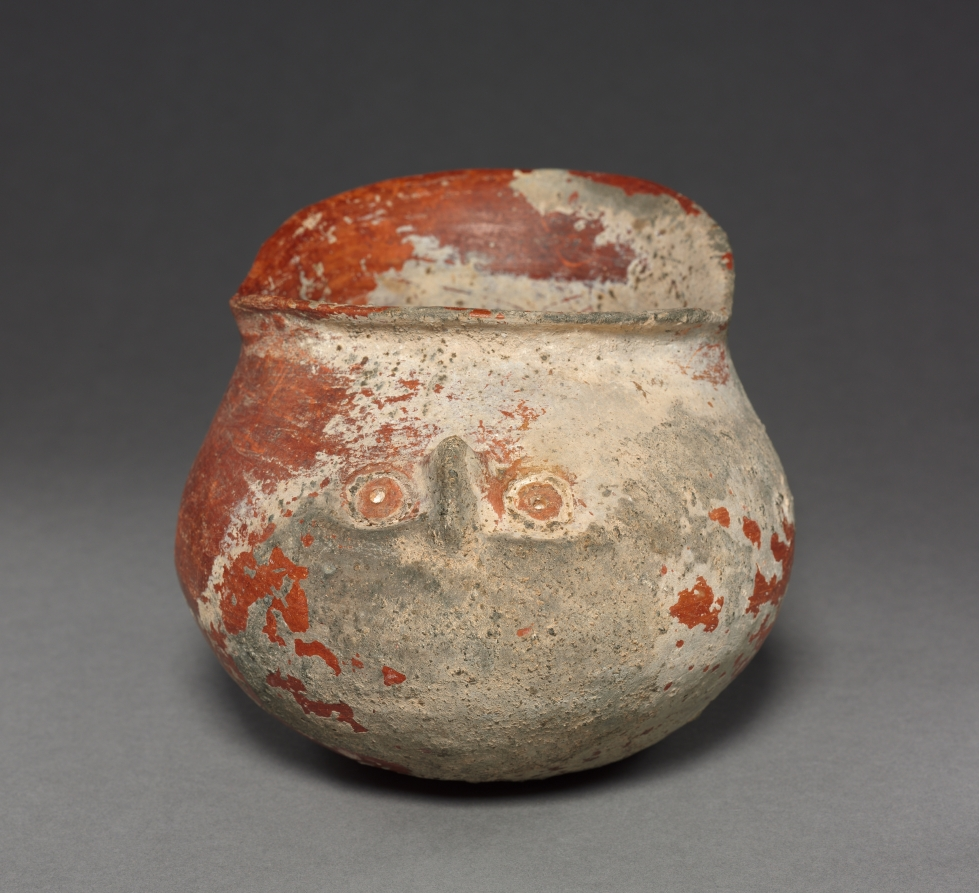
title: Head Effigy Bowl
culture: Mexico, Region of Tilantongo, District of Tlaxiaco, Nayarit style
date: 100 BCE–300 CE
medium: pottery with burnished red slip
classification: Ceramic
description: After about 200 BC, West Mexican chieftains gained in authority, their new status reflected in shaft tombs that shelter not only their remains but also lavish offerings, including sculptural ceramics. Many of the ceramics may refer to the crucial activities of a chief’s life, such as marriage, feasting, and war. The meaning of this unusual bowl—a head whose gaping mouth serves as the aperture—is unknown.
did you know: Diego Rivera and Rufino Tamayo were avid collectors of ancient Nayarit art.